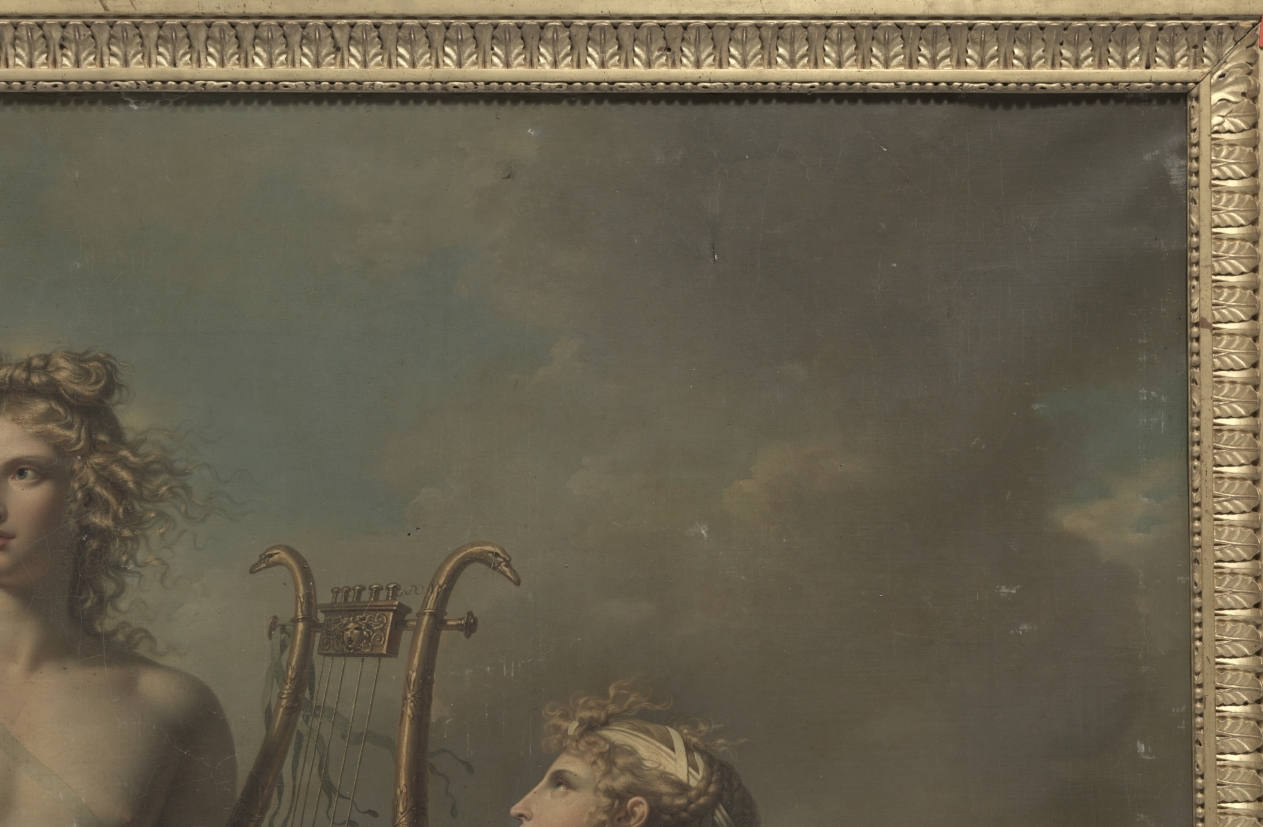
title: Apollo, God of Light, Eloquence, Poetry, and the Fine Arts with Urania, Muse of Astronomy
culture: France, late 18th century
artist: Charles Meynier (French, 1768–1832)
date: 1798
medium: oil on canvas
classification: Painting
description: A recipient of the Grand Prix de Rome in 1789, Charles Meynier became a member of the Académie des Beaux-Arts in 1815 and painted large ceiling decorations at the Louvre and numerous pictures glorifying the Napoleonic legend. Erato, Muse of Lyrical Poetry belongs to a cycle of five paintings executed to fulfill a commission from businessman François Boyer-Fonfréde. They were intended to decorate his home in his native Toulouse and constitute a rare instance of a complete cycle of major paintings that remain intact rather than being split up and separately dispersed.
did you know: Urania leans on a starry orb, indicating her role as the muse of astronomy.